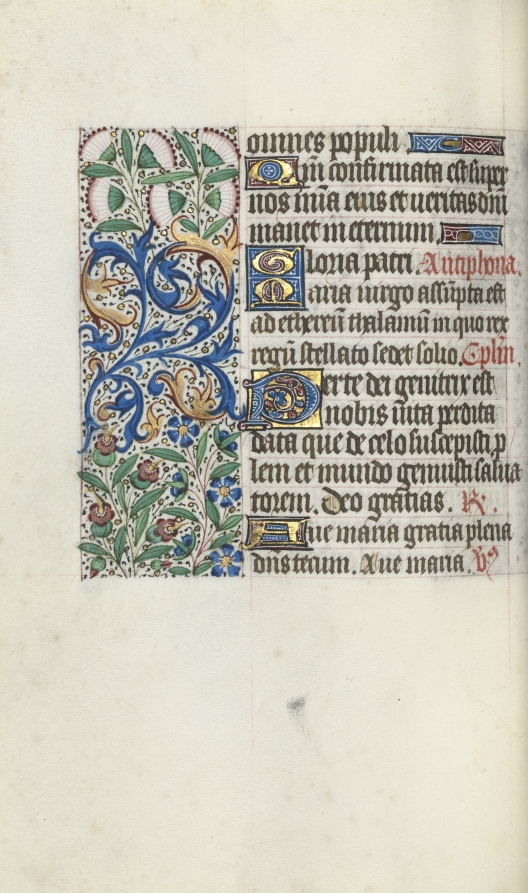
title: Book of Hours (Use of Rouen): fol. 60v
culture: France, Rouen, 15th century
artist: Master of the Geneva Latini (French, active Rouen, 1460–80)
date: c. 1470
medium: ink, tempera, and gold on vellum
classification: Bound Volume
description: In the late 1400s and early 1500s Rouen was an established and important center of book production. The city’s cathedral had a wealthy chapter that spent large sums of money to commission books and to maintain its extensive library. The stationers and booksellers would have likely been concentrated in or near the cathedral precinct. This artist, named after a manuscript now in Geneva, was Rouen’s principal illuminator during the second half of the 1400s.